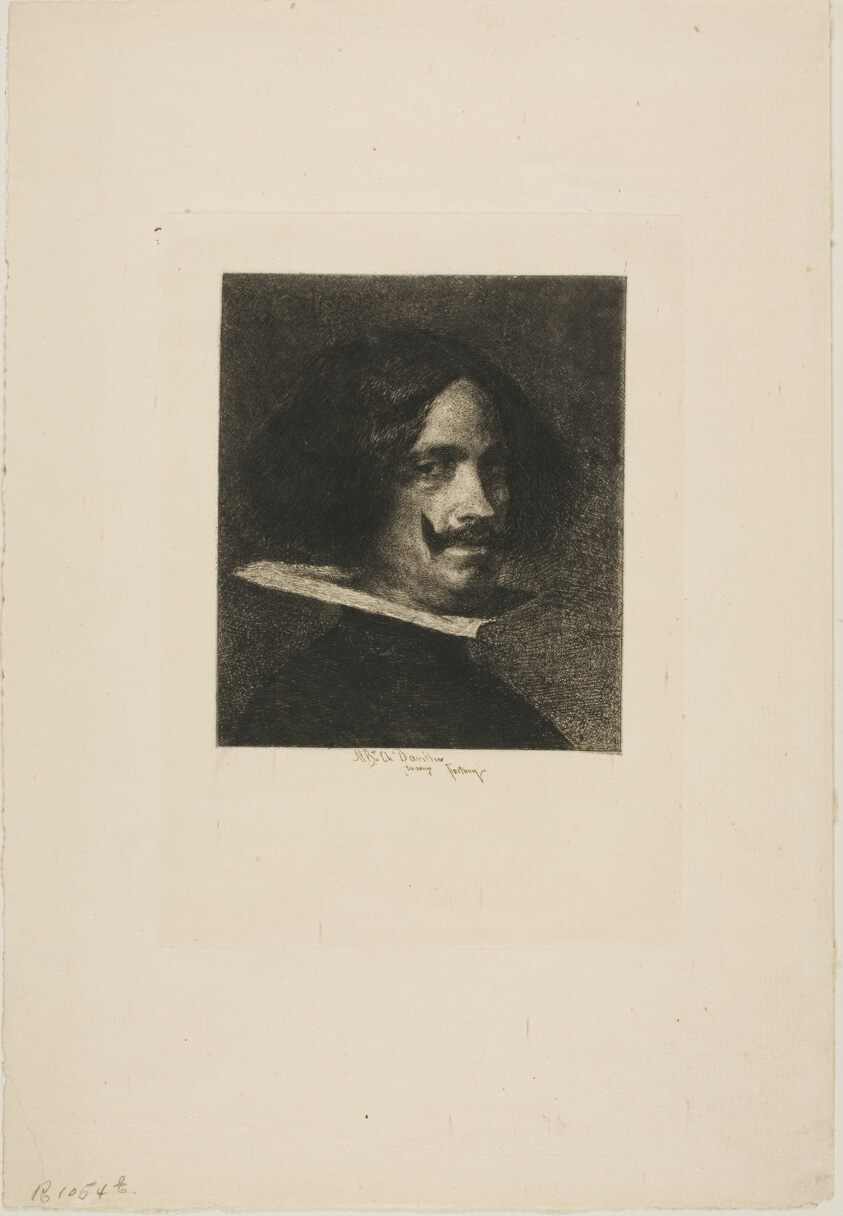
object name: Print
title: Portrait of Velasquez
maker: Mariano José María Bernardo Fortuny y Carbó; Spanish, 1838-1874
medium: Etching on paper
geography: Spain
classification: etching; print; prints and drawing